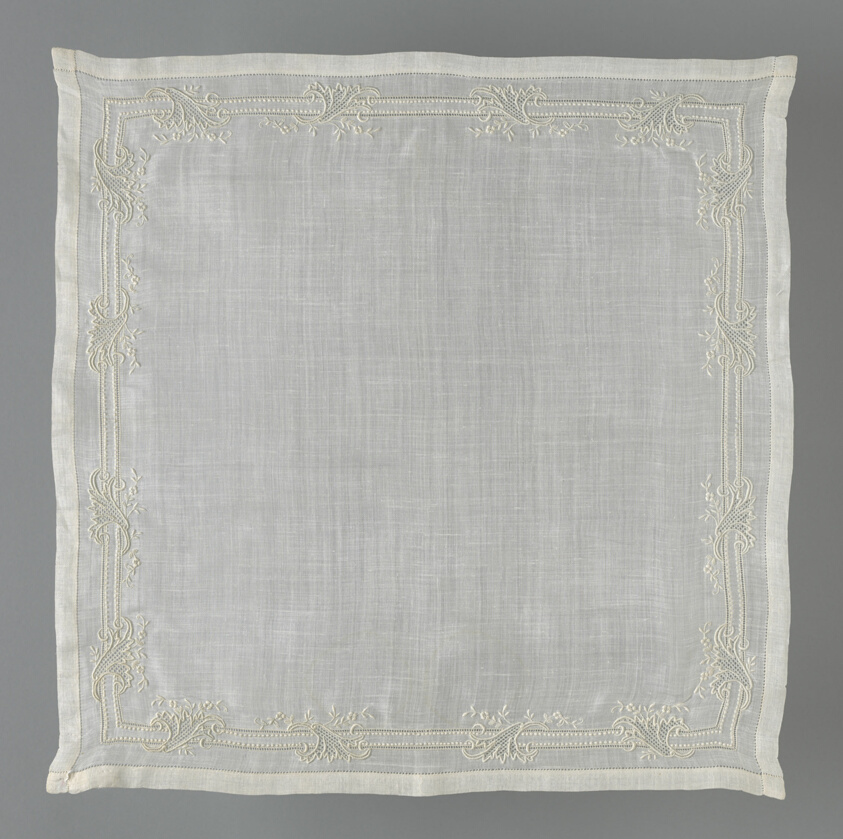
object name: Textile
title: Handkerchief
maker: Switzerland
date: 1892/1900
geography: Switzerland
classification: textile; needlework (visual works); weaving; accessories (object genre)